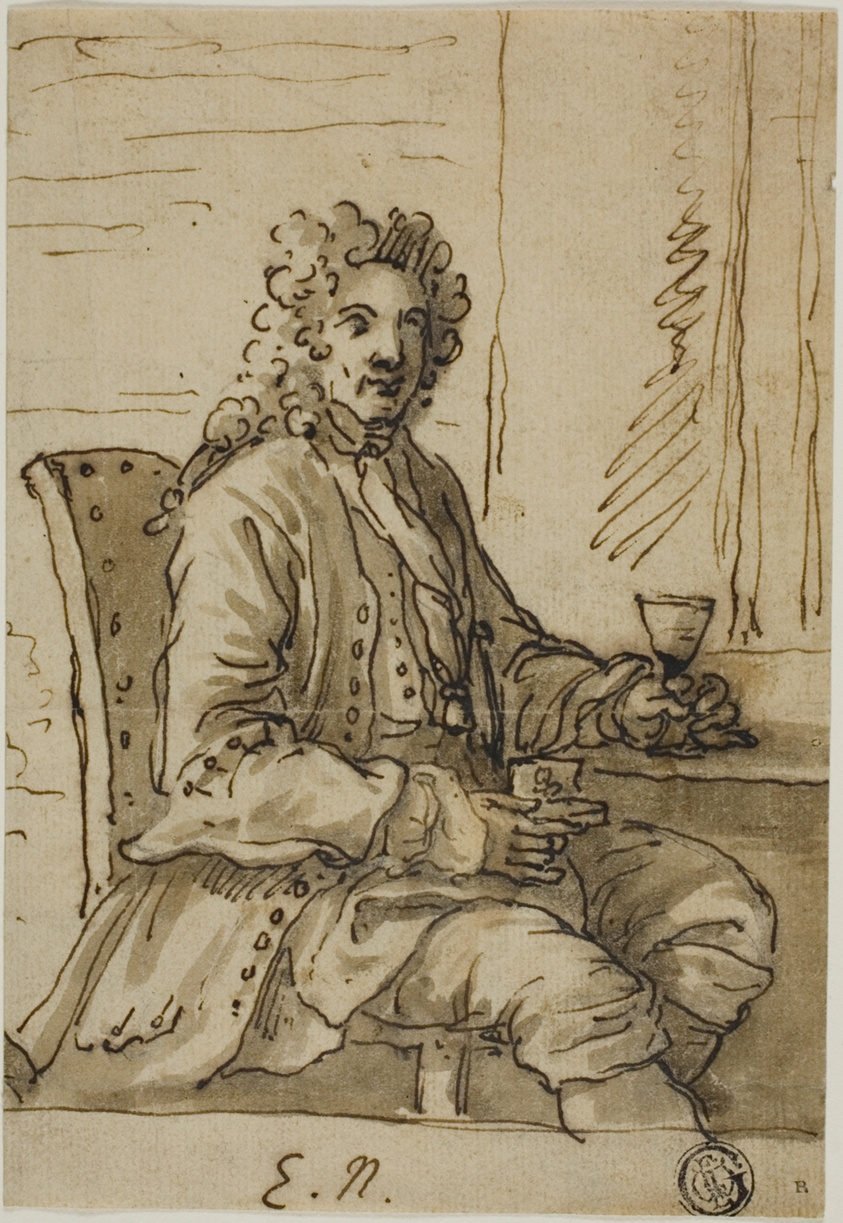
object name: Drawing and Watercolor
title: Edmond Nicholas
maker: James Thornhill (English, 1675-1734)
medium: Pen and brown ink with brush and brown wash, over graphite, on cream laid paper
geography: England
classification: pen and ink drawings; drawings (visual works); prints and drawing